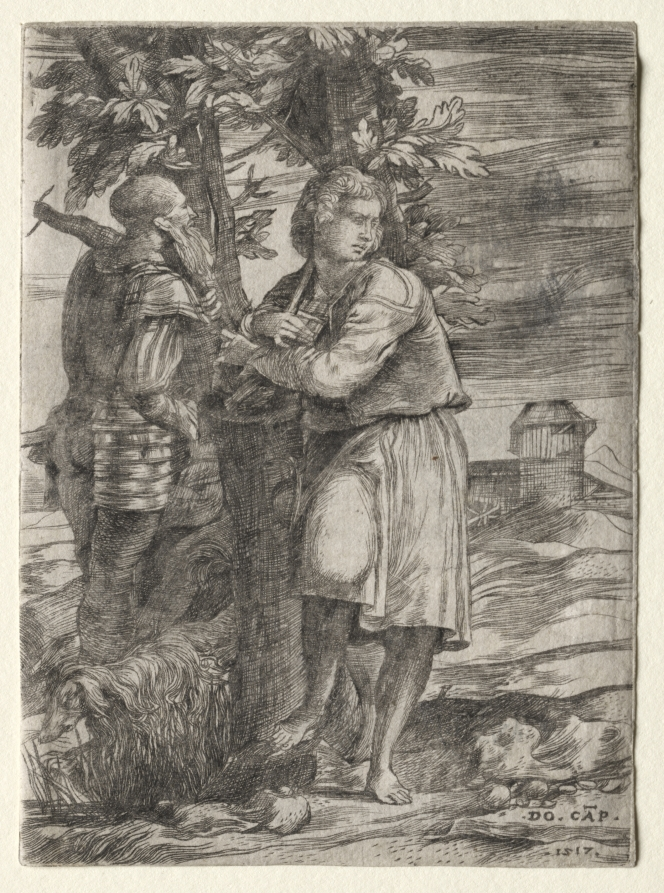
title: Shepherd and Old Warrior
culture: Italy, 16th century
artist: Domenico Campagnola (Italian, 1500–1564)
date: 1517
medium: engraving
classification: Print